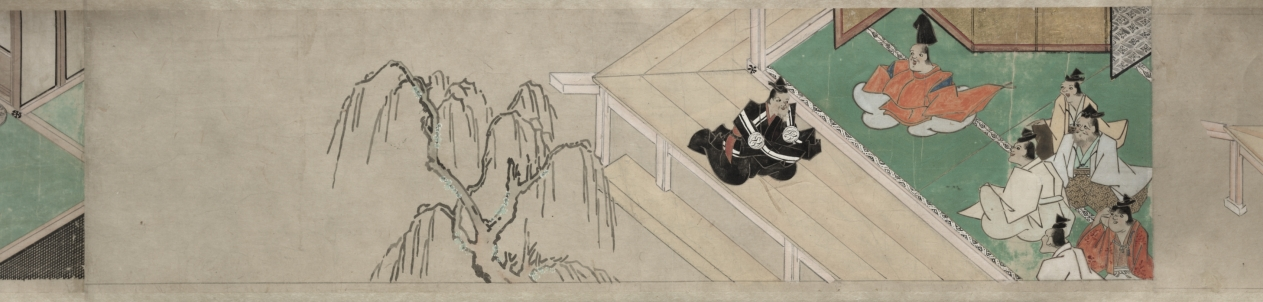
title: The Saltmaker's Story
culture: Japan, Edo period (1615–1868)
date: early 1600s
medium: One of a pair of handscrolls; ink, color, and gold on paper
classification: Painting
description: Once read and copied by girls at New Year’s celebrations and included in dowries, The Saltmaker’s Story is a rags-to-riches tale in which daughters are gifts from the gods. Despite his simple outlook, the main character progresses from humble roots as an associate at Kashima Shrine to the elite status of grandfather of the emperor through the intervention of the Kashima deity. The Saltmaker’s Story is traditionally presented in a set of three scrolls, but the text of this set has been removed by a previous owner, who remounted the illustrations as a pair. The paintings of this one take us from right to left through the first half of the tale.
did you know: This handscroll originally had texts before its paintings, but the texts were removed.